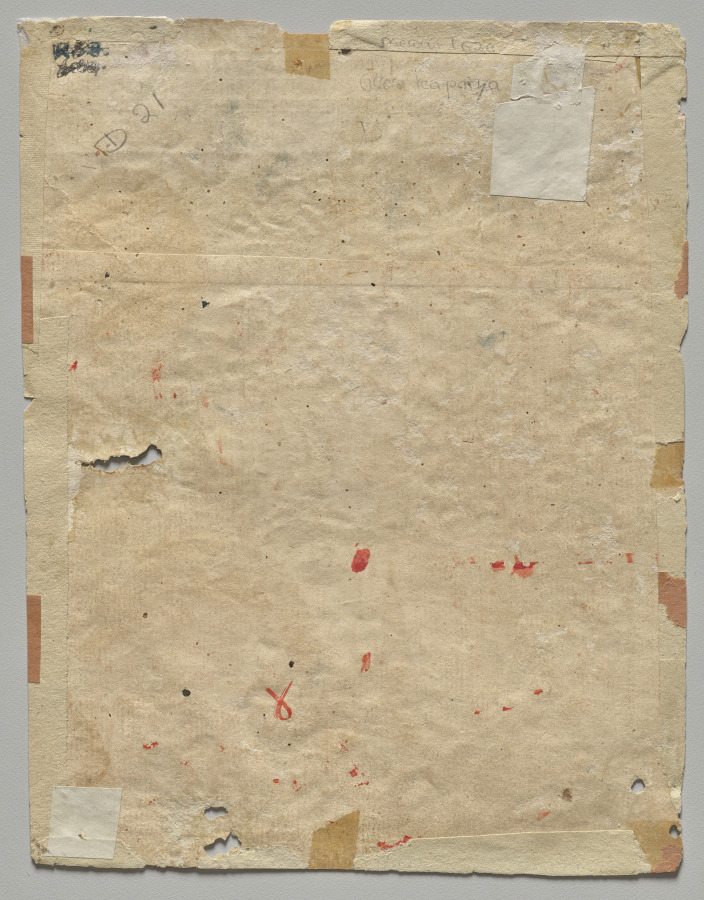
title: Krishna and Gopis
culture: Northwestern India, Rajasthan, Rajput Kingdom of Mewar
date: c. 1660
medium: Gum tempera, ink, and gold on paper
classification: Painting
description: While Radha waits for Krishna in her bower, he is flirting with other women of the cowherding community. Like a fickle lover, sometimes god abandons his devotee and showers blessings on others. Radha's companion comes to bring her the news of Krishna's playful, erotic activities.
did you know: The Yamuna River flows across the bottom of the page.